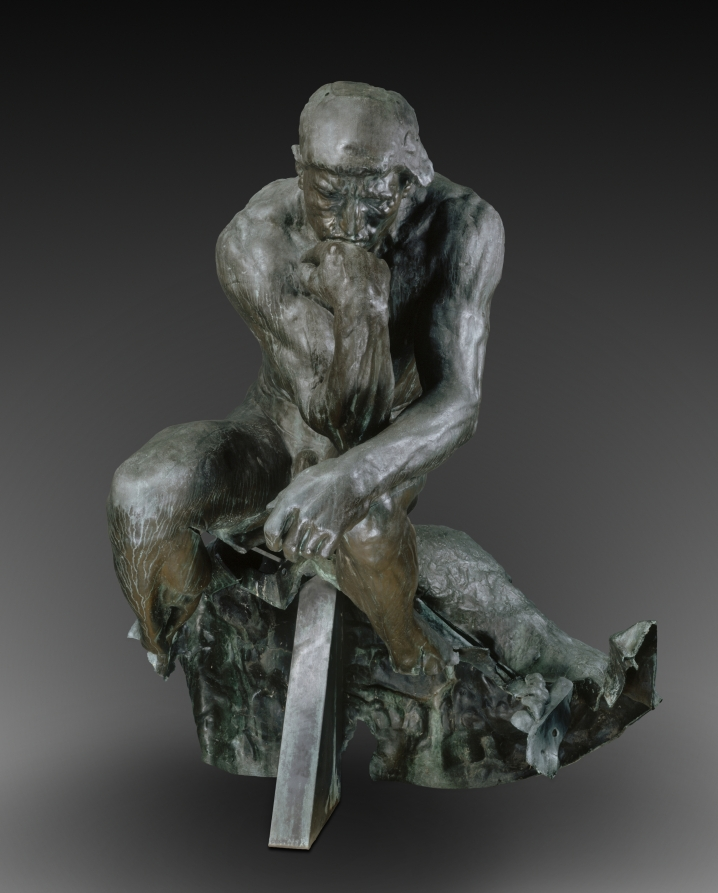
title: The Thinker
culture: France, 19th century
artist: Auguste Rodin (French, 1840–1917)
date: 1880–81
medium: bronze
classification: Sculpture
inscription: signed on base near sinister foot: "A. Rodin."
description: The Thinker was first developed as part of Rodin's The Gates of Hell, a sculptured doorway for a proposed museum of decorative arts in Paris. Intended to be part of a relief directly above the doors, the rugged figure was originally conceived as a generalized image of the Italian poet Dante Alighieri (1265–1321), who wrote the Divine Comedy.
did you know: This enlarged version of The Thinker is one of less than 10 cast during Rodin's lifetime.